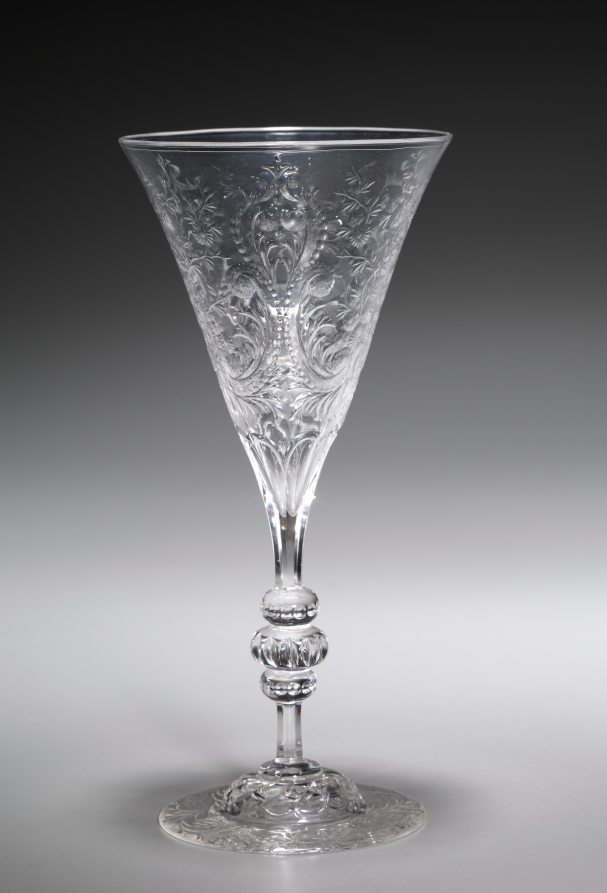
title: Glass from a Place Setting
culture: probably America, late 19th-early 20th century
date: c. 1890–1920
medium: glass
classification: Glass